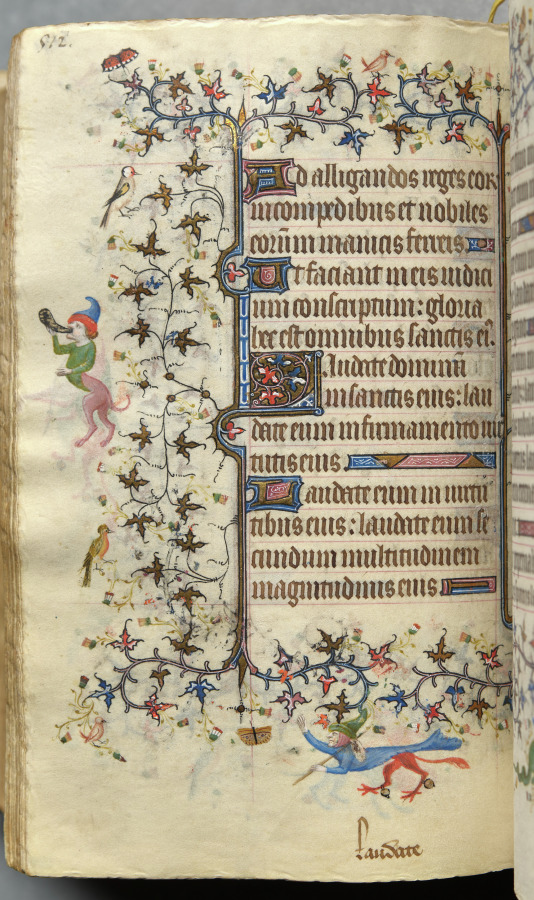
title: Hours of Charles the Noble, King of Navarre (1361-1425): fol. 250v, Text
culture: France, Paris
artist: Master of the Brussels Initials and Associates (French)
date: c. 1405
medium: ink, tempera, and gold on vellum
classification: Bound Volume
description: This precious volume was obviously highly prized by its owner, the French-born King of Navarre, who had his coat of arms painted on no less than twenty folios. Rather than directly commissioning this manuscript from a specific workshop, it seems that Charles the Noble acquired his book of hours -- perhaps ready-made for the luxury market -- while on a trip to Paris in 1404-05. A collaborative effort, six painting styles are evidenced within the pages of this codex, those of two Italians, two Frenchmen, and two Netherlanders. The painter who was responsible for the planning and decoration of the book, and who produced seventeen of the large miniatures, was a Bolognese artist known as the Master of the Brussels Initials. His principal assistant, responsible for most of the borders, was a Florentine who signed his name "Zecho" da Firenze on folio 208 verso.